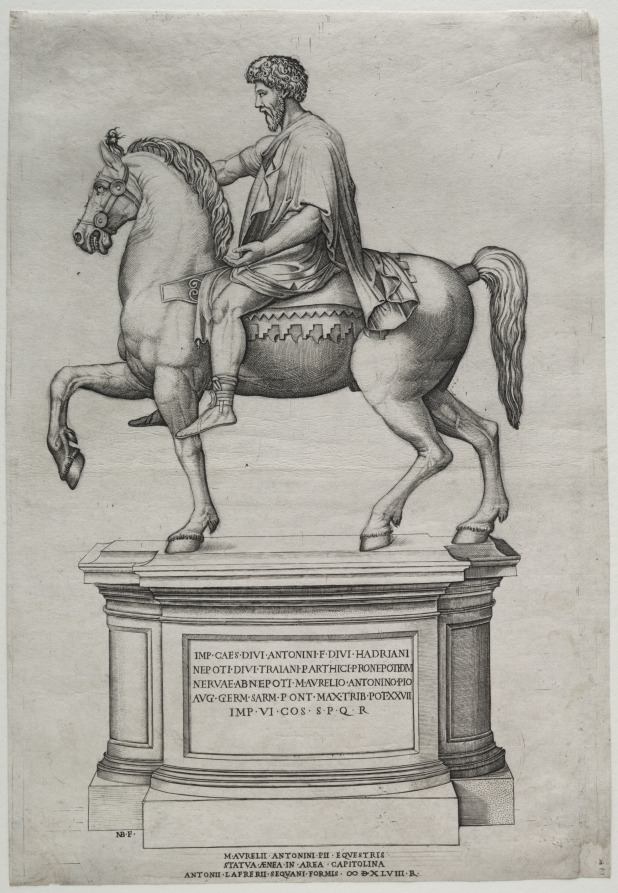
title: Equestrian Statue of Marcus Aurelius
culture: France, worked in Rome, 16th century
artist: Nicolas Beatrizet (French, active Italy, 1507 or 1515-about 1565)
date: 1548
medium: engraving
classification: Print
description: When Michelangelo redesigned the Campidoglio, a civic piazza on top of Capitoline Hill in Rome, he repositioned the ancient Equestrian Statue of Marcus Aurelius in the center of the piazza on a newly designed plinth with antique-style lettering. Just after the piazza was completed, Nicolas Beatrizet made this engraving of the statue and plinth as part of a series of prints of Roman monuments, which were often purchased by travelers to Rome. Michelangelo was uncredited in such images, but his impact on civic design gradually became part of the collective visual memory of Rome.